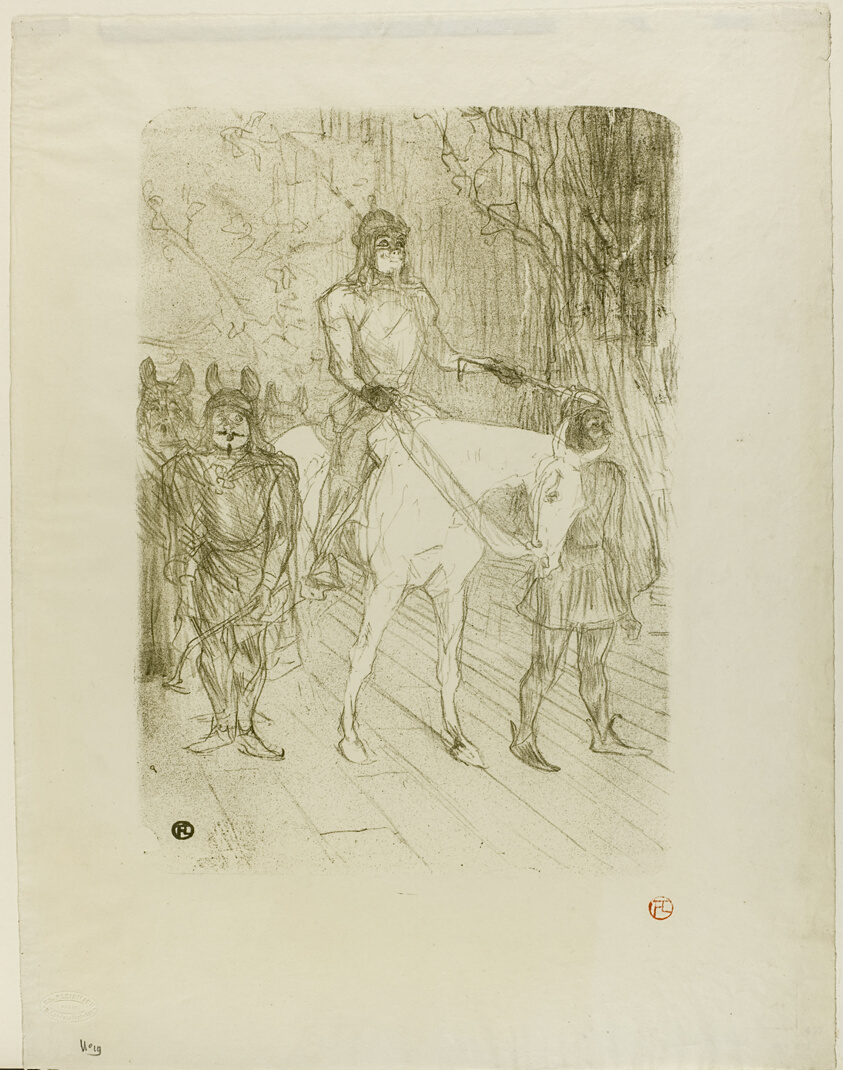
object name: Print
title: Brasseur's Entrance in Chilpéric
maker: Henri de Toulouse-Lautrec (French, 1864-1901)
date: 1895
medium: Color lithograph on ivory wove paper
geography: France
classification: lithograph; print; prints and drawing